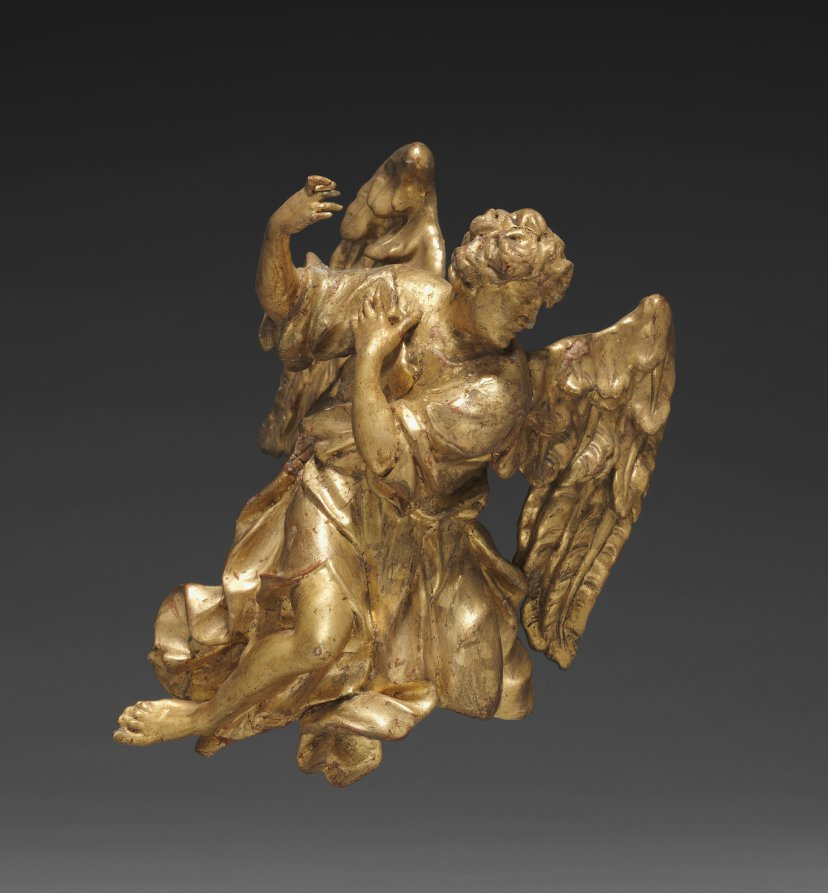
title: Altarpiece with Relics - Angel, lower left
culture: Germany, Bavaria, 18th century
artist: Joseph Matthias Götz (German, 1696–1760)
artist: and Workshop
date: c. 1735–40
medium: gilded wood, with relics in niches: gilded wood, mother-of-pearl, ebony, red silk, gold wire, seed pearls, rock crystal, pen and ink on paper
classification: Sculpture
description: Götz covers every surface in gold leaf, giving each part of the object equal importance, rather than simply framing a central picture. In this distinctively Central European approach, figural narrative is subordinate to the overall ensemble. Götz designed this object to rest on top of an altar, probably in front of a larger painted or sculpted decorative scheme. The work contains relics seen through the small windows on the perimeter. These small remains of holy figures demonstrate the persistence of a medieval Catholic tradition well into the 1700s.